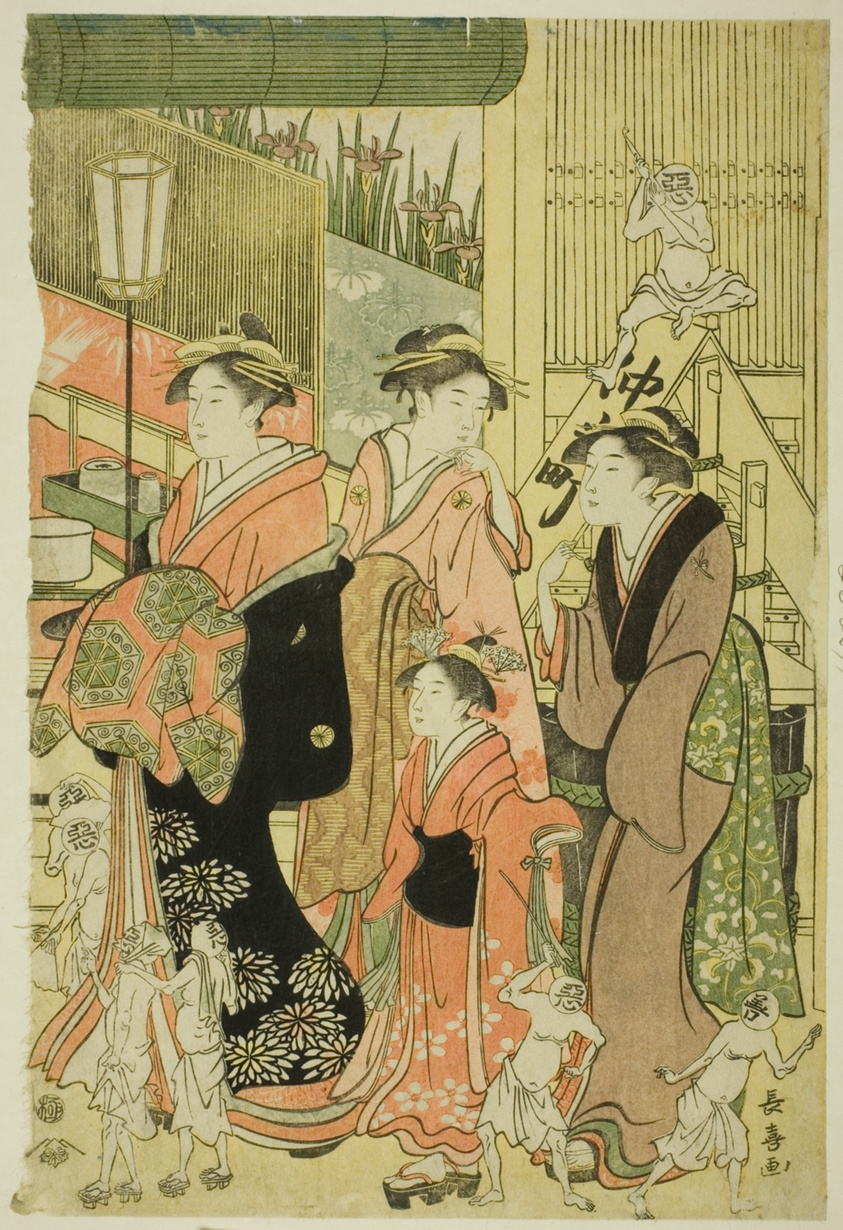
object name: Print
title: Good and Evil Influences (Zendama akudama)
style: Japanese (culture or style)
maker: Eishosai Choki (Japanese, active c. 1790s-early 1800s)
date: c. 1795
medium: Color woodblock print; center sheet of oban triptych (left sheet: 1929.737)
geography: Japan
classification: woodblock print; print; asian art